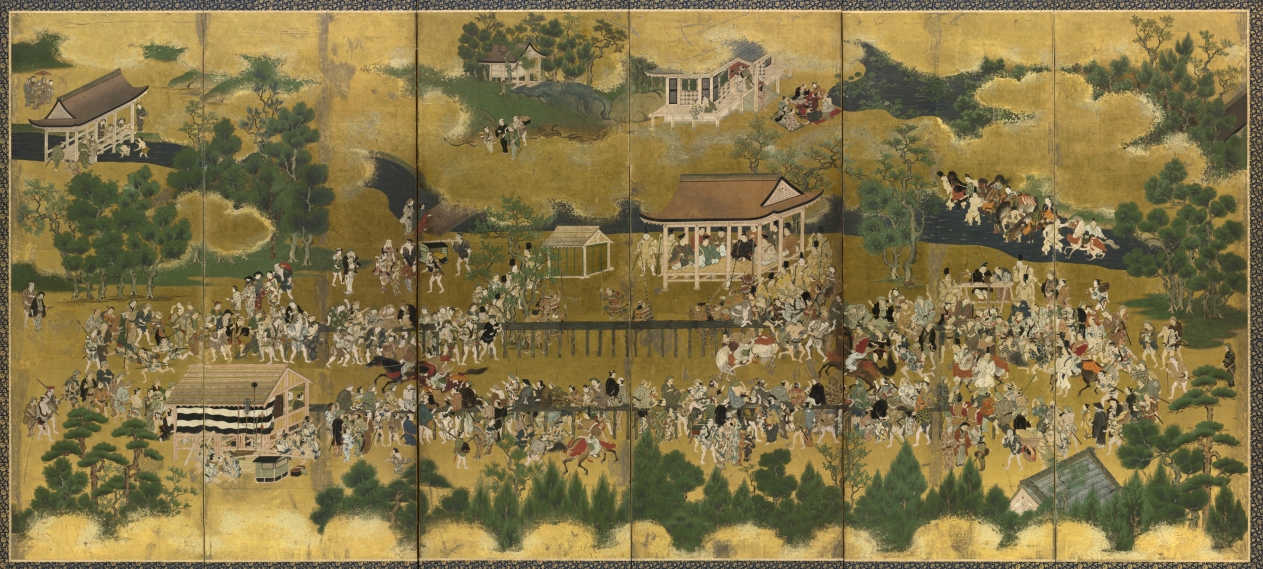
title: Horse Race at the Kamo Shrine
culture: Japan, Edo period (1615–1868)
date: early to mid-1600s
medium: One of a pair of six-panel folding screens; ink and color on gilded paper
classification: Painting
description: Kamo Shrine in Kyoto, seen in the upper half of the left screen, has held an annual horse race on May 5th since the ninth century. Serving as a snapshot of the festivities, this pair of screens captures nearly 600 people watching the race, beginning at the bottom part of the right screen and continuing to the left. The race is a great spectacle where aristocratic riders cling to their fast and unwieldy mounts. While many of those in attendance seem in rapt attention to the main event, other vignettes depict people engaged in an array of activities. This pair of screens was likely originally part of a group of linked murals.